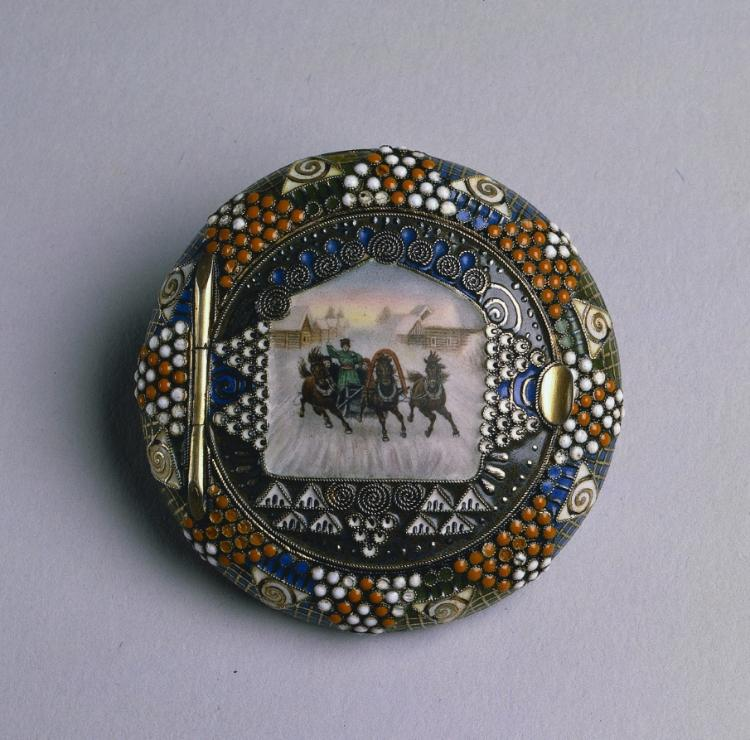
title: Pill or Snuff Box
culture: Russia, St. Petersburg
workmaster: attributed to Feodor Ivanovich Rückert (Russian, 1840–1917)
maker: House of Fabergé (Russian, 1842–1918)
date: 1906–16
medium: silver gilt and enamel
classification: Miscellaneous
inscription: Marks: Kokoshnik (?), tester's initials [assay mark of Moscow, 1908-26]; 88; C. Fabergé (in Cyrillic); double-headed eagle [imperial warrant]; scratched 25477.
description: Fabergé’s craftsmen in Moscow became known for their work in the pan-Slavic or neo-Russian taste, hearkening back to 17th-century styles of Russian folk decoration. This little box for pills, snuff, or cosmetic patches follows on in this style with its scene of a romantic ride in the quintessential mode of Russian transportation, a horse-drawn sleigh or troika.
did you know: Around 1900, ladies often carried little boxes for medicines, a pinch of snuff, or cosmetic patches for the face.